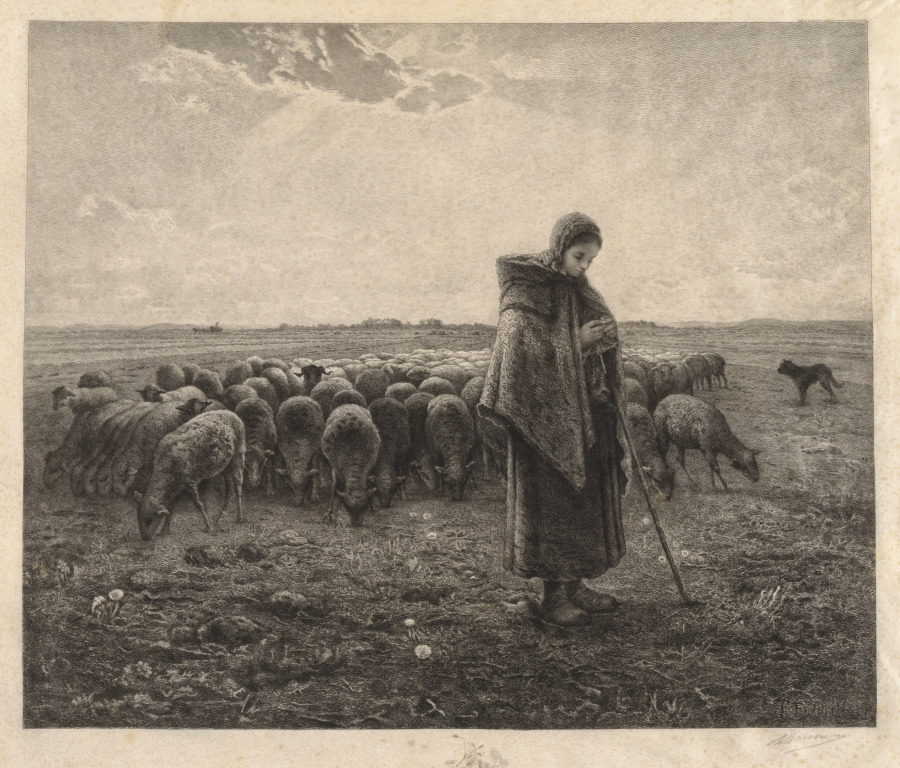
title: La Bergerie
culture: France, 19th century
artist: Benjamin-Louis-Auguste Damman (French, 1835–1921)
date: 1885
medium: etching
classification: Print